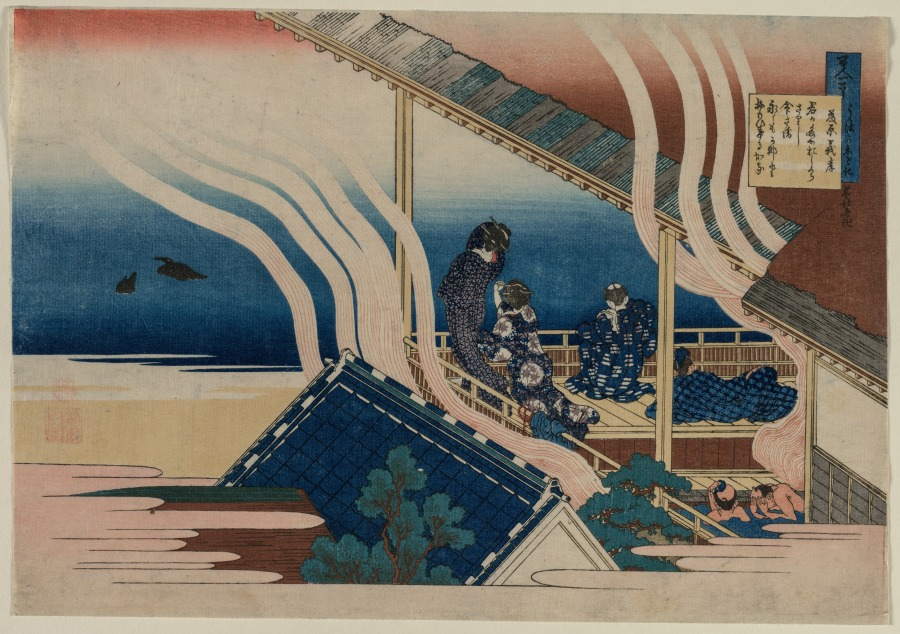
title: Poem by Fujiwara no Yoshitaka, from the series One Hundred Poems by One Hundred Poets Explained by an Old Nurse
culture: Japan, Edo period (1615–1868)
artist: Katsushika Hokusai (Japanese, 1760–1849)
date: 1835–36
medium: Color woodblock print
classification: Print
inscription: Signature: Zen Hokusai Manji Publisher: Iseya Sanjiro (Eijudo) Censorship Seal: kiwame